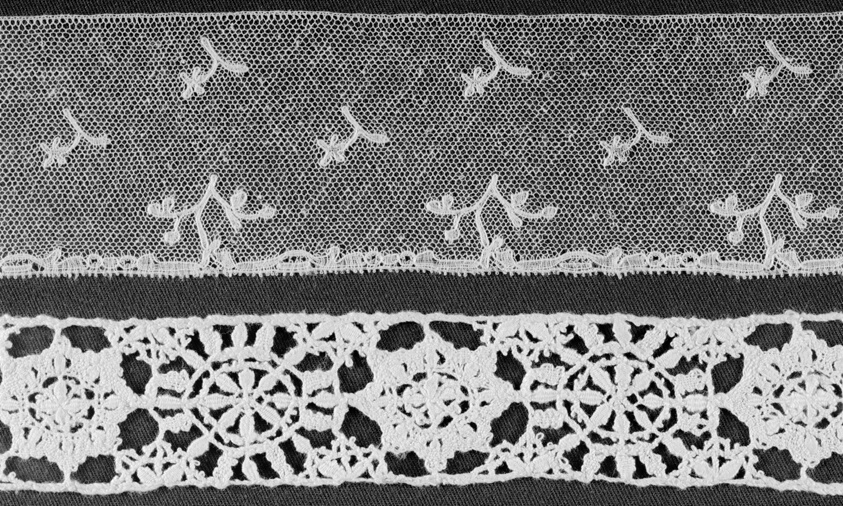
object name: Textile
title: Border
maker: France, Lille or England, Midlands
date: 1810/20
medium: Linen, bobbin straight lace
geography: France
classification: textile; lace - bobbin; lace